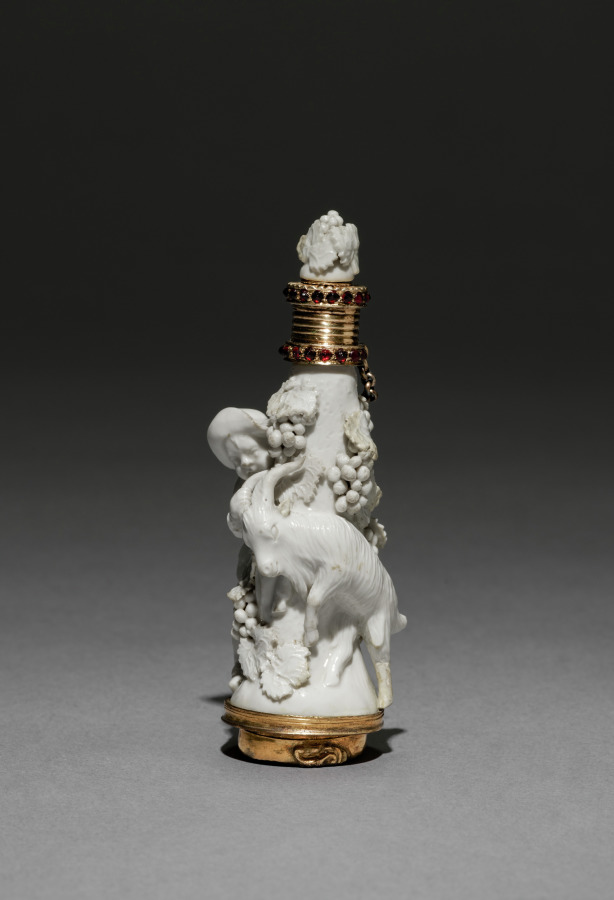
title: Scent Bottle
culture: England, Chelsea, mid-18th century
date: mid 1700s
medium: soft-paste porcelain with gilt metal mounts set with red faceted stones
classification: Miscellaneous